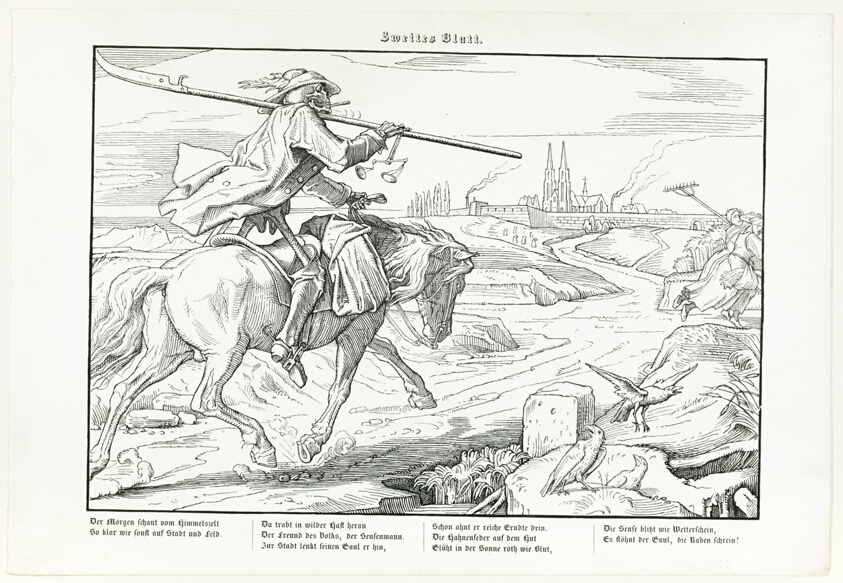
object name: Print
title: Auch ein Todtentanz, plate II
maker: Alfred Rethel (German, 1816-1859)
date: 1848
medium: Wood engraving in black on ivory wove paper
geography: Germany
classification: woodcut; print; prints and drawing